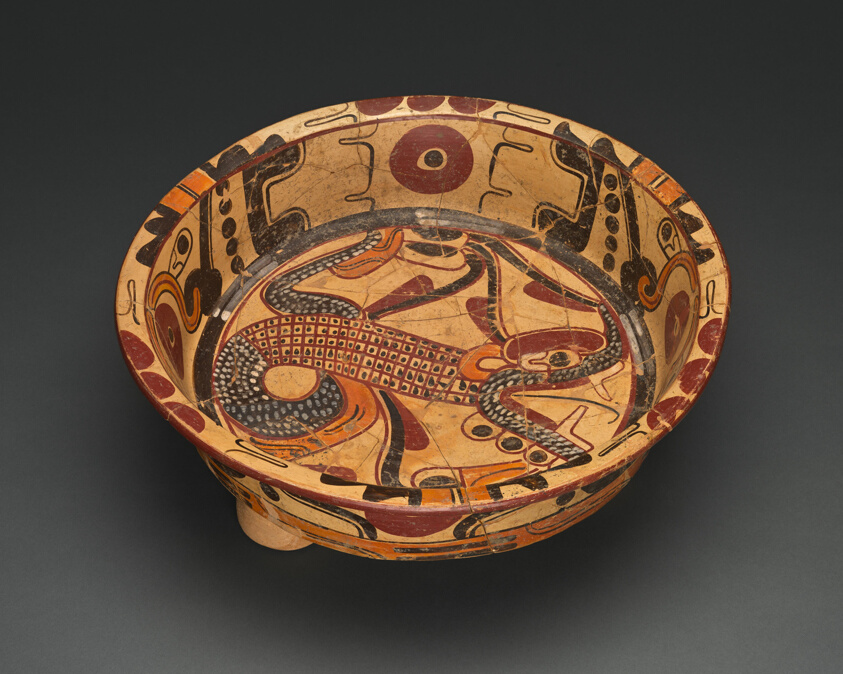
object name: Vessel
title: Tripod Polychrome Bowl Depicting a Serpent with Feathers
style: classic veracruz, mesoamerican, Pre-Columbian, americas, Arts of the Americas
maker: Classic Veracruz; Los Tuxtlas, southern Veracruz, Mexico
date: 500–750 CE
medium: Ceramic and pigment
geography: Southern Veracruz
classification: bowl; earthenware; ceramics; vessel; art of the americas